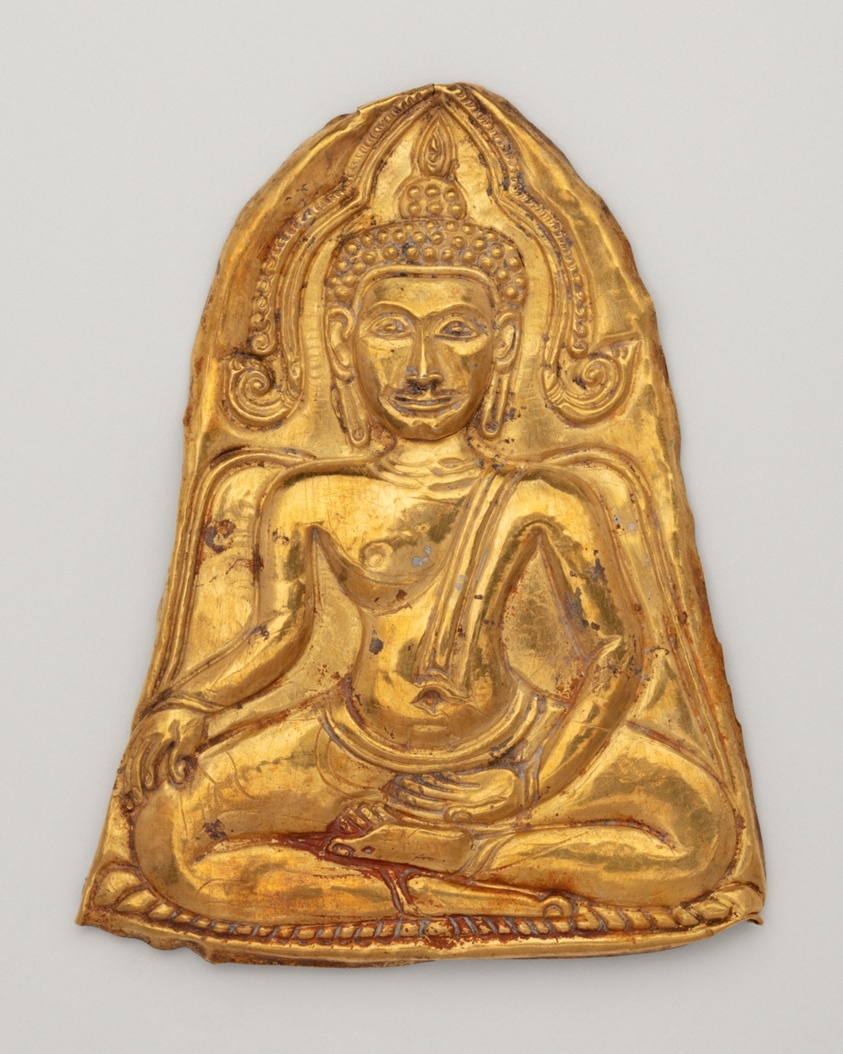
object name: Religious/Ritual Object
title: Votive Plaque with Buddha Triumphing over Mara (Maravijaya)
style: Southeast Asian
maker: Thailand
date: 19th century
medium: Gold repoussé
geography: Thailand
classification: gold; metal; sculpture; asian art; ritual objects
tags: Buddha